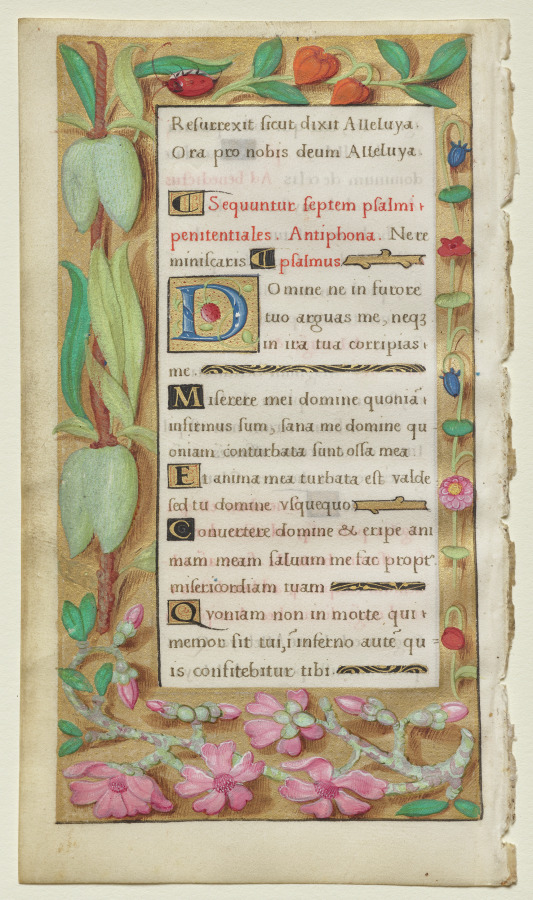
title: Leaf from a Book of Hours: Penitential Psalms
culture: France, 16th century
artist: Noël Bellemare (French, d. 1546)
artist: The 1520s Hours Workshop (French)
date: c. 1530–1535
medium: ink, tempera and liquid gold on vellum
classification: Manuscript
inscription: Resurrexit, sicut dixit, alleluia: Ora pro nobis Deum, alleluia. Sequuntur septem pfalmi penitentiales. Antiphona. Ne reminiscaris. psalmus: Domine , ne in durore tuo arguas me Miserere mei domine quoniam infirmus sum : sana me domine, quoniam conturbata sunt ossa mea Et anima mea turbata est valde : sed tu domine usquequo Convertere domine et eripe animam meam : salvum me fac propter misericordiam tuam. Quoniam non est in morte qui memor sit tui : in inferno autem quis confitebitur tibi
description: The 1520s Hours Workshop produced luxury books of hours for a wealthy, often royal, clientele. Recent evidence points to Paris as the site of the workshop’s activity under the direction of Antwerp-born miniaturist Noël Bellemare (died 1546). Containing fuschia pinks and bright acid greens, the palette is unusual in French manuscript painting of the period. Instead, Bellemare’s miniatures point directly to Antwerp painting at the time.